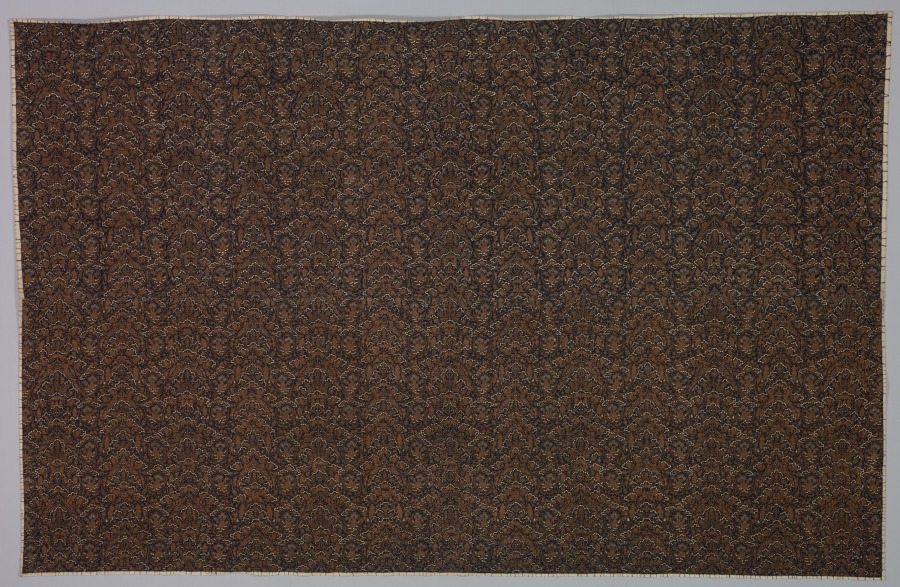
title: Ceremonial Cloth (Kampo)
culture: Indonesia, Central Java, 19th century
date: 1800s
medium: batik; cotton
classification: Textile